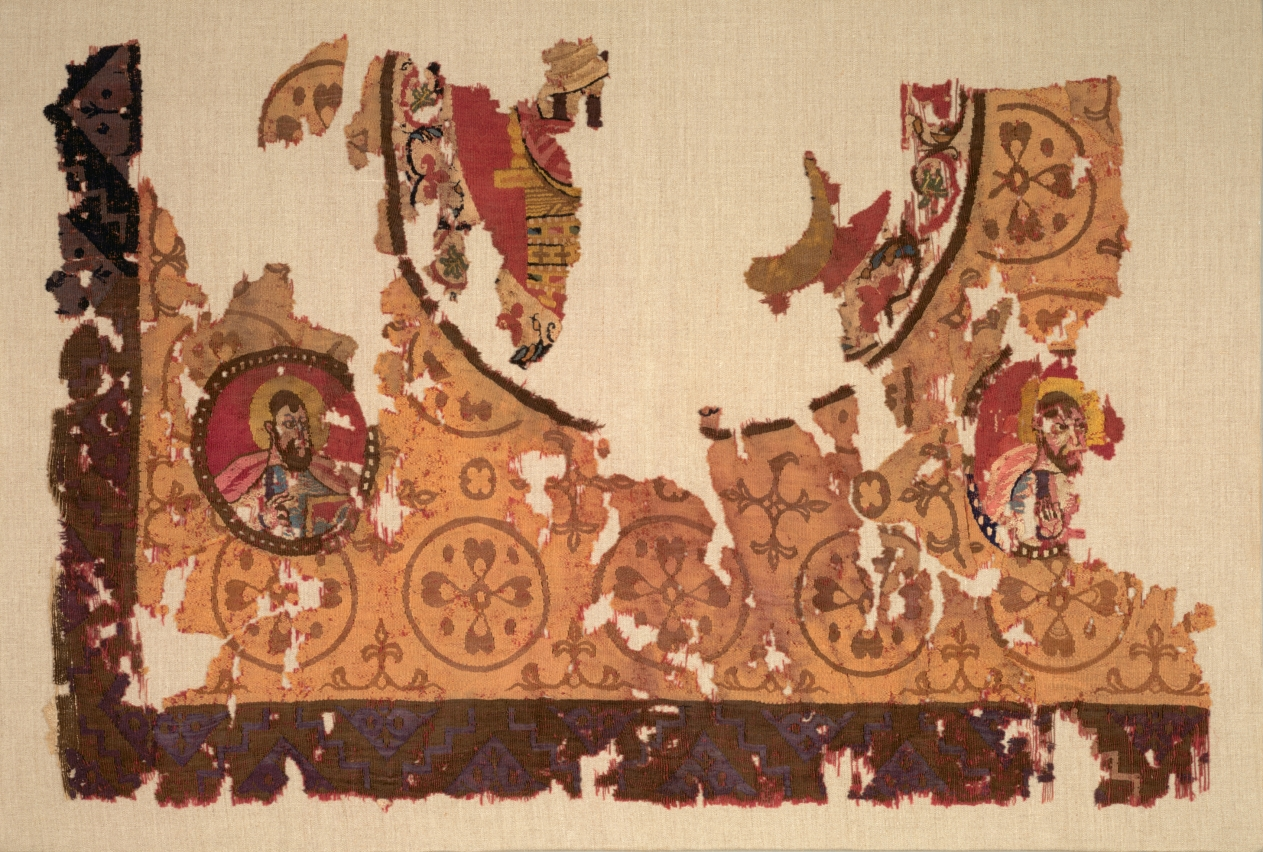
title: Fragmentary Icon Panel, Christ in Glory (?) and Evangelists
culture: Egypt, Abbasid period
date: 750 – 850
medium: slit-and dovetailed-tapestry weave; wool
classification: Textile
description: In this extraordinary fragment with a rare background resembling woven silk patterns, two roundels in the corners display the busts of haloed Evangelists holding books and raising their right hands in a gesture of teaching. In the center, the large roundel preserves traces of an enthroned figure, presumably that of Christ in Glory (the jeweled throne is visible on the left). A geometric pattern of zigzags and triangles decorates the border. Woven on a verticle loom, tapestry weave has colorful horizontal wefts that are interlaced only in the area needed for the pattern; slits are formed when the colored wefts turn back around the same vertical warp for several rows. Warp and wefts reference the basic directional patterns of weaving—warp being the longitudinal threads with the transverse weft being drawn over and under the warp.